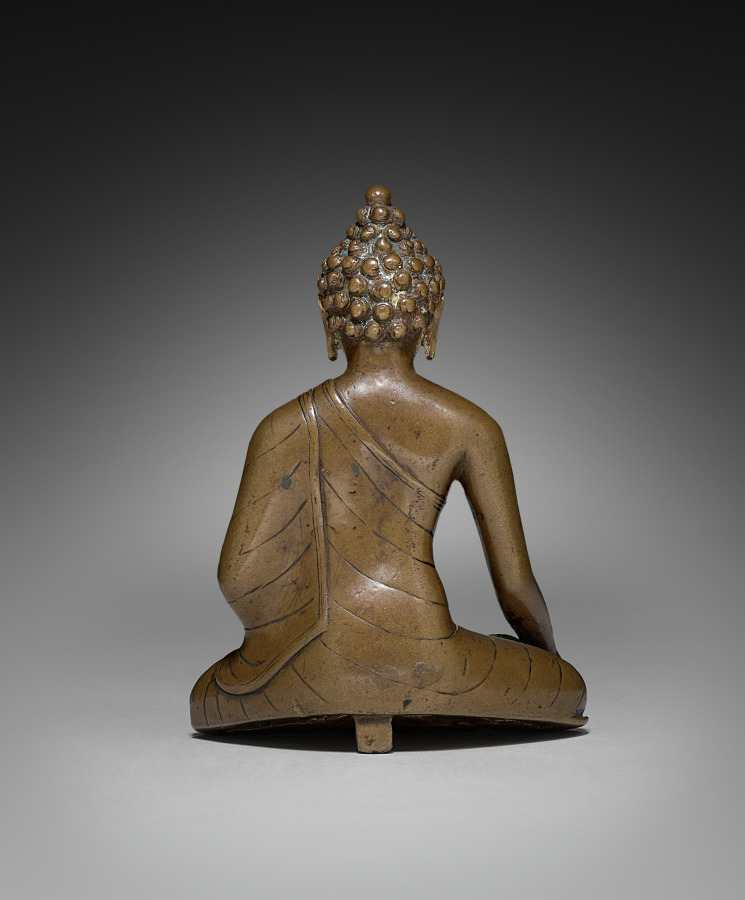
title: Seated Buddha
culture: India, Bengal(?), Pala period, 9th century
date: 800s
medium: bronze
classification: Sculpture